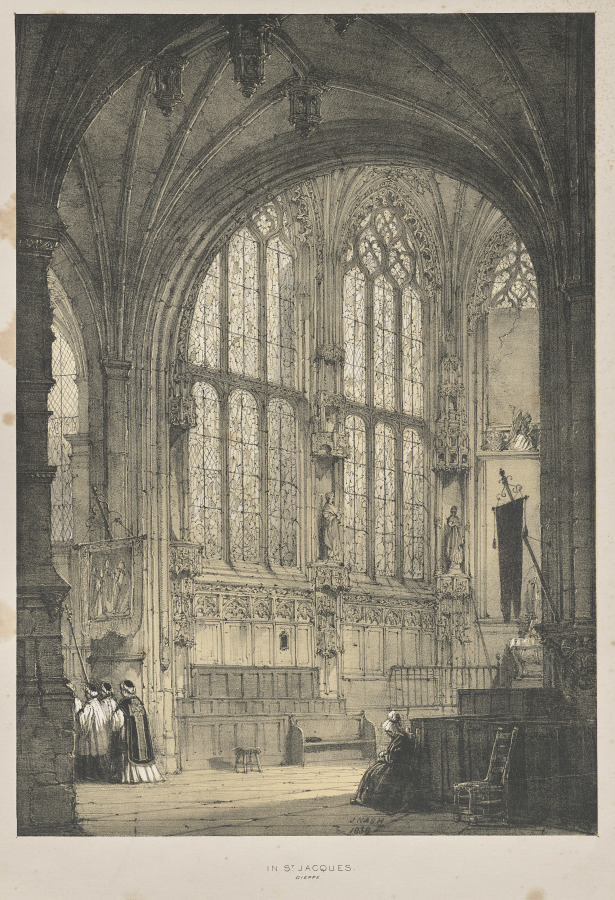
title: Architecture of the Middle Ages: In St. Jacques, Dieppe, East End, Interior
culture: England, 19th century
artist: Joseph Nash (British, 1808–1878)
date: 1838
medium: lithograph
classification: Print